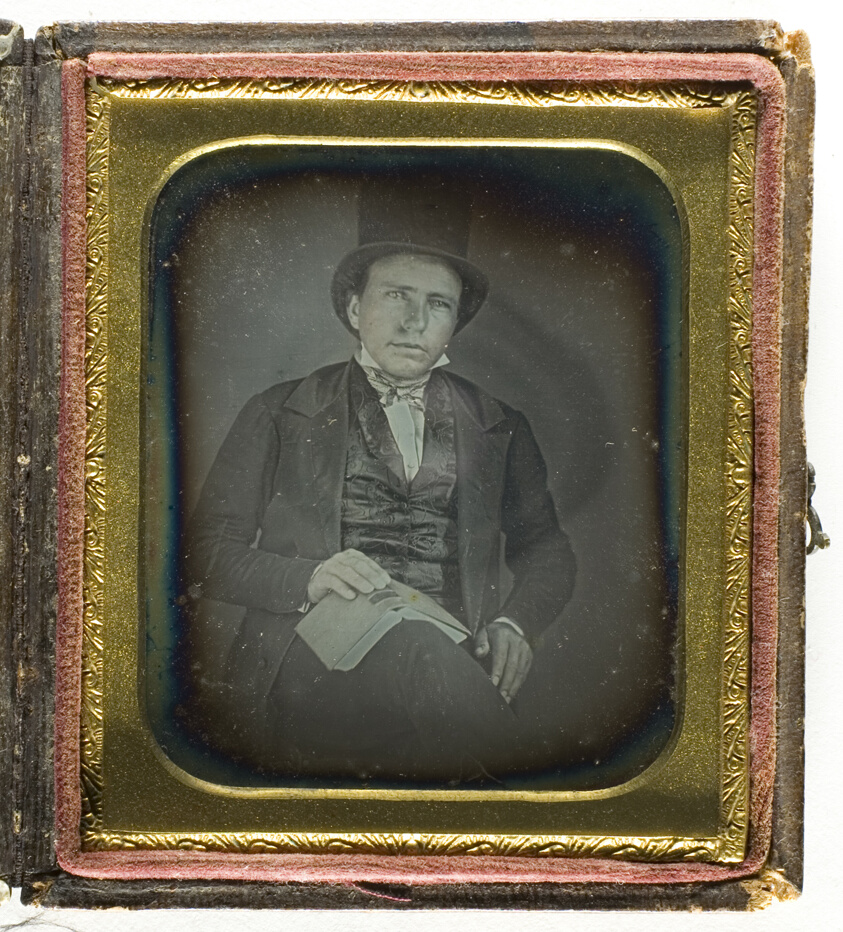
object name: Photograph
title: Untitled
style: 19th century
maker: Artist unknown; 19th century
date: 1853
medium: Daguerreotype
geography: Unknown Place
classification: daguerreotype; photographic process; photography; photograph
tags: portraits, portraits: male subject, photography, formal portraits